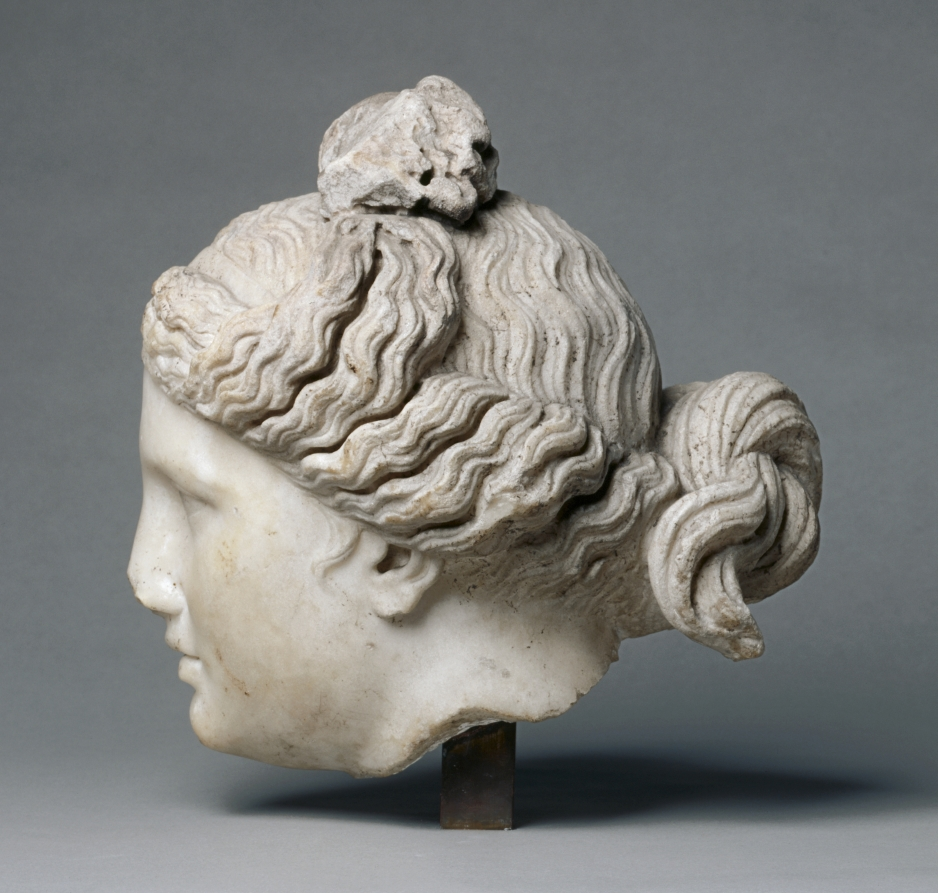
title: Head of Aphrodite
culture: Italy, Roman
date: 100–200 CE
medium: marble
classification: Sculpture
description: With idealized features including a straight nose, small mouth with thick lips, and a hairstyle best known from the so-called Capitoline Venus (now in Rome), this head likely belonged to a full-scale statue of the goddess of love. Like the Capitoline Venus and many other sculptures of the Roman period, it probably showed the goddess nude and bathing, harking back to the groundbreaking sculpture of Aphrodite at Knidos, carved by Praxiteles in the mid-fourth century BC.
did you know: The elaborate hairstyle, arranged in a bow atop the head, identifies this figure as Aphrodite.